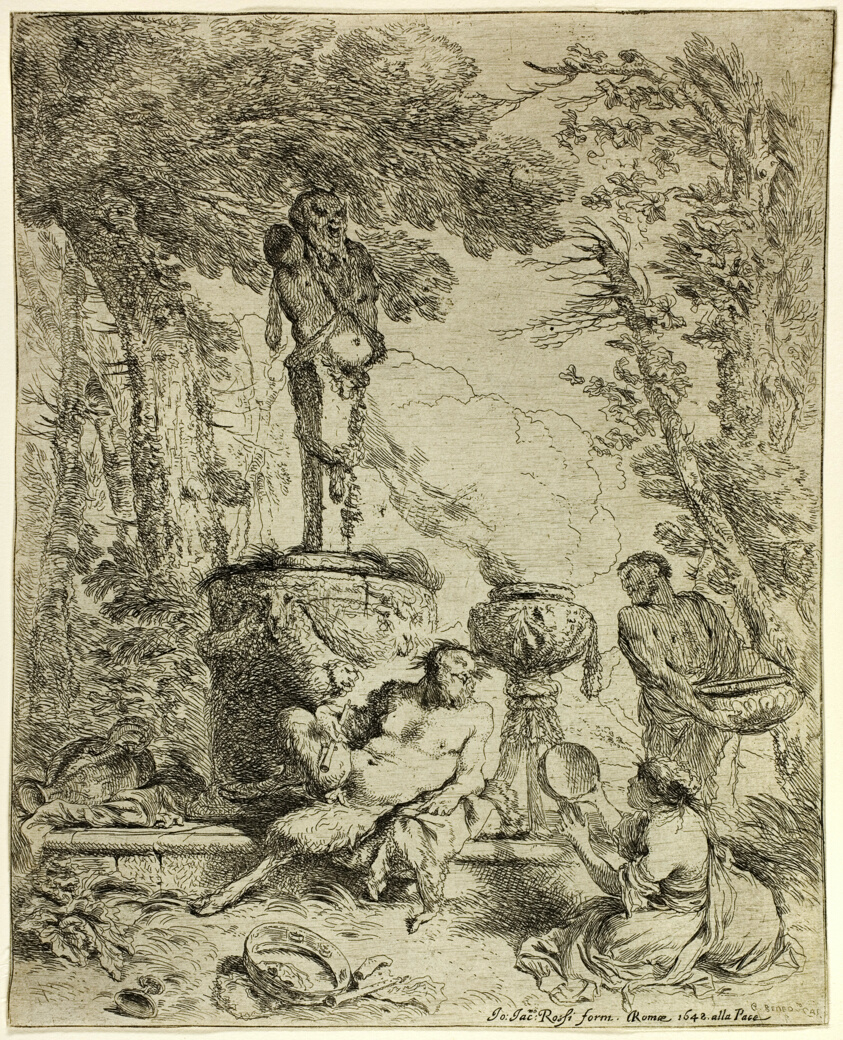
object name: Print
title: Feast of Pan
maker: Giovanni Benedetto Castiglione (Italian, 1609-1664)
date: c. 1647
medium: Etching on ivory paper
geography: Italy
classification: etching; print; prints and drawing